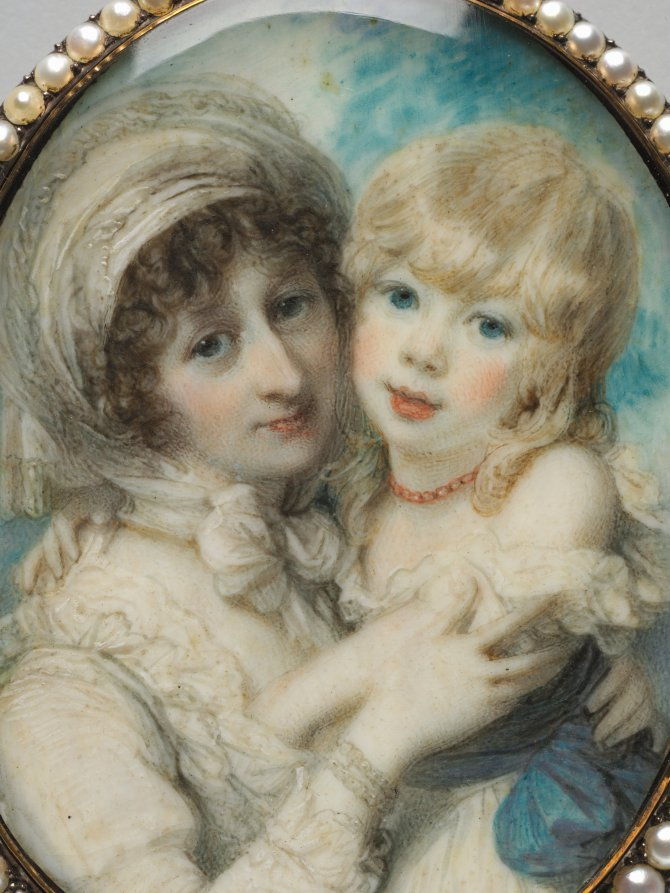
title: Portrait of Catherine Clemens and Her Son, John Marcus Clemens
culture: England, 19th century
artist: Richard Cosway (British, 1742–1821)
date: c. 1800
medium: watercolor on ivory in a gold and split pearl frame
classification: Portrait Miniature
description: This sensitive portrait of Catherine Clemens and her son, John Marcus, was painted around 1800 and exemplifies the prettiness for which Cosway was so well known. The artist’s trademark turquoise blue sky is reflected in the boy’s brilliant blue eyes and the bow on the frock that slips informally off his shoulder. This miniature also showcases Cosway’s mature technique of delicate stipplework throughout the faces, contrasted with looser brushstrokes for the hair and garments. Both John Marcus and his mother are swathed in white ruffled fabric, against which the paleness of their skin seems even more pronounced. Like his contemporaries, Cosway used the bare ivory ground to enhance the creaminess of flesh tones. John Marcus wears a coral necklace, frequently given to children during this period as a talisman believed to ward off illness. His innocent, childish gesture of reaching down his mother’s dress for her breast is awkward considering his disproportionately large size. The fact that he is still young enough to wear a gown rather than breeches suggests that he is under four years old, and yet his head and lips are larger than his mother’s. During the final decades of the eighteenth century, aristocratic women as prominent as the Duchess of Devonshire were electing to breastfeed their children rather than send them to wet nurses, and this may be a delicate reference to Catherine Clemens’s philosophy of “natural” parenting.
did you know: Portraits of mothers with their children were much more common in the 1700s and 1800s in Britain than were portraits of fathers with their children.